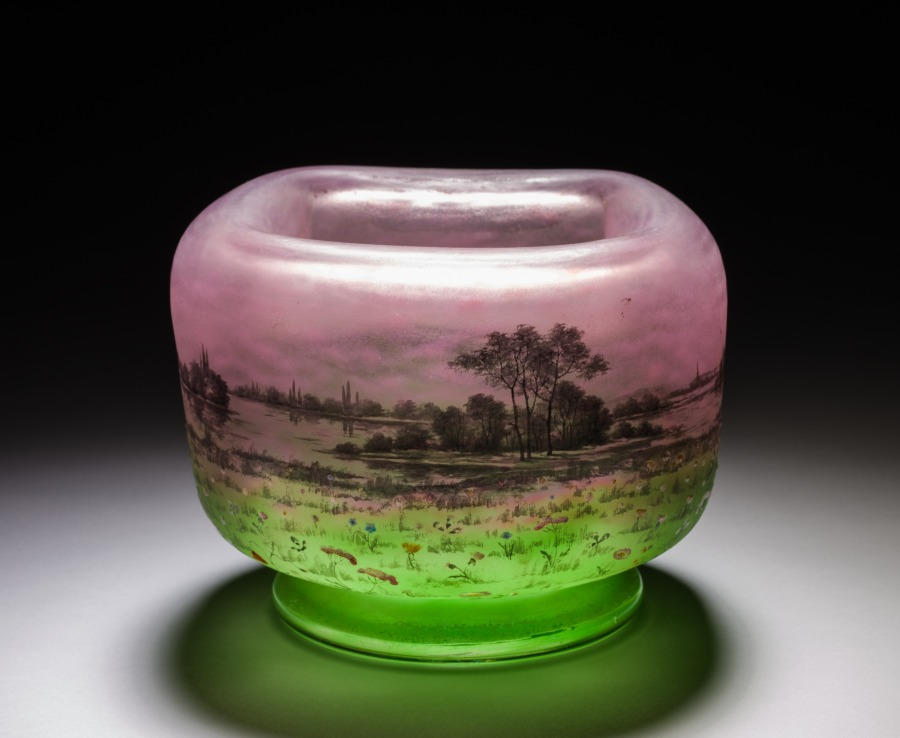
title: Bowl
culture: France, Nancy, late 19th-early 20th Century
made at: Daum Brothers (French)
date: late 1800s - early 1900s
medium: glass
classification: Glass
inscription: signed on bottom: Daum Nancy.